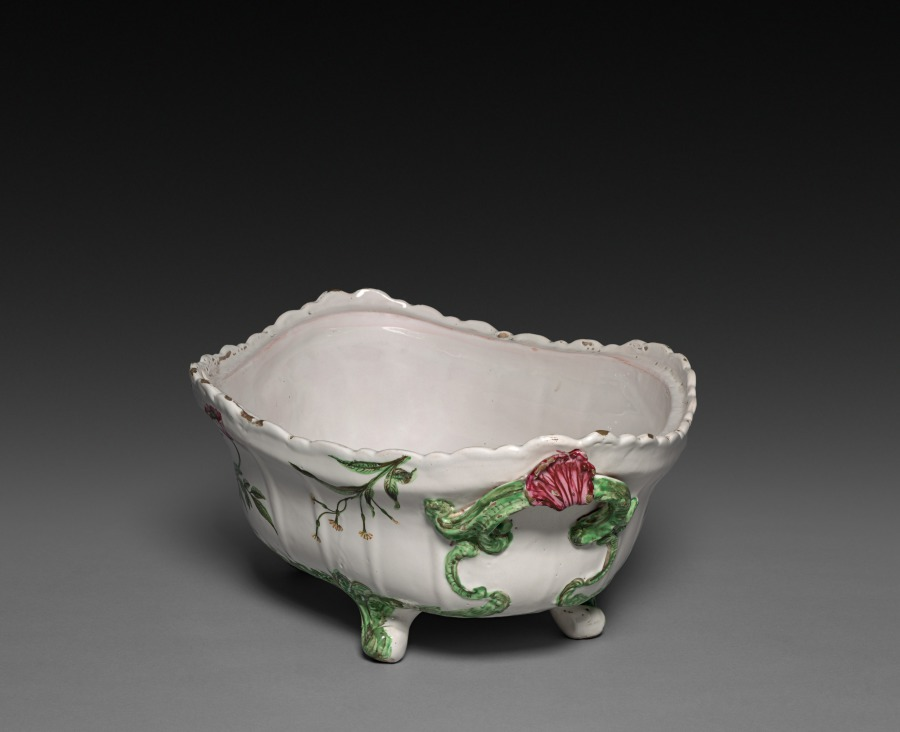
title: Tureen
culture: France, Marseilles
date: c. 1760–70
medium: faience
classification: Ceramic